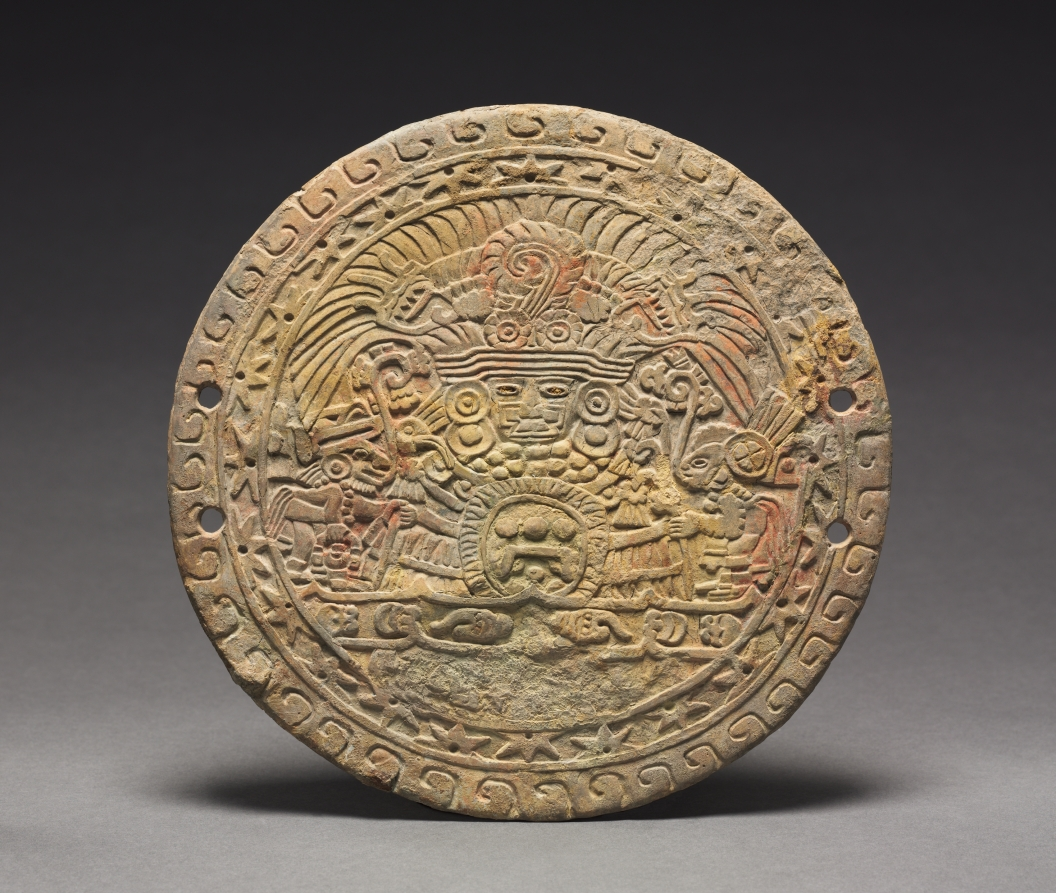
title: Mirror Back with Great Goddess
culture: Guatemala(?), Escuintla, Teotihuacán style, Classic Period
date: 400–550 CE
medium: slate, pigment; other side originally inlaid with polished pyrite mirror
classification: Sculpture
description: An important female deity commands the watery scene on the back of this mirror. The face, bordered by ear ornaments and partially hidden by a nose ornament, appears beneath a huge headdress with the fringed eyes and curled proboscis of an abstract butterfly. The deity rests on a shell-studded water band and two adoring humans offer flowers or incense in a bag. Mirrors served as costume ornaments and perhaps were used in rituals to divine the unknown.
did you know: This ancient Teotihuacan mirror may have been used in divination rituals.